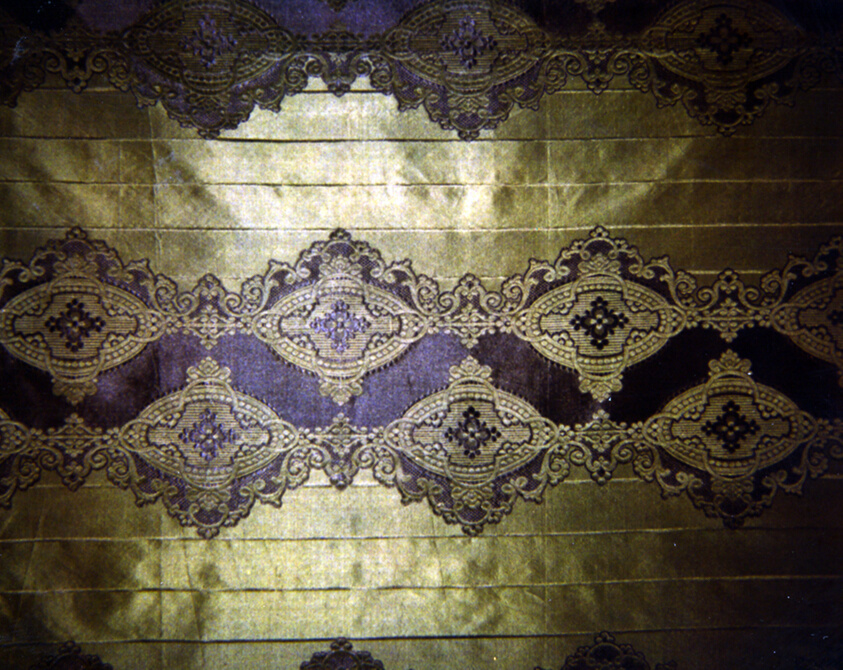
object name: Textile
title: Panel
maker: Probably England or France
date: 1890s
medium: Silk, plain weave with supplementary warps with bands of plain interlacings of discontinuous secondary binding warps and supplementary patterning wefts and with bands of supplementary patterning wefts; probably woven on loom with Jacquard attachment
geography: England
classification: textile; weaving